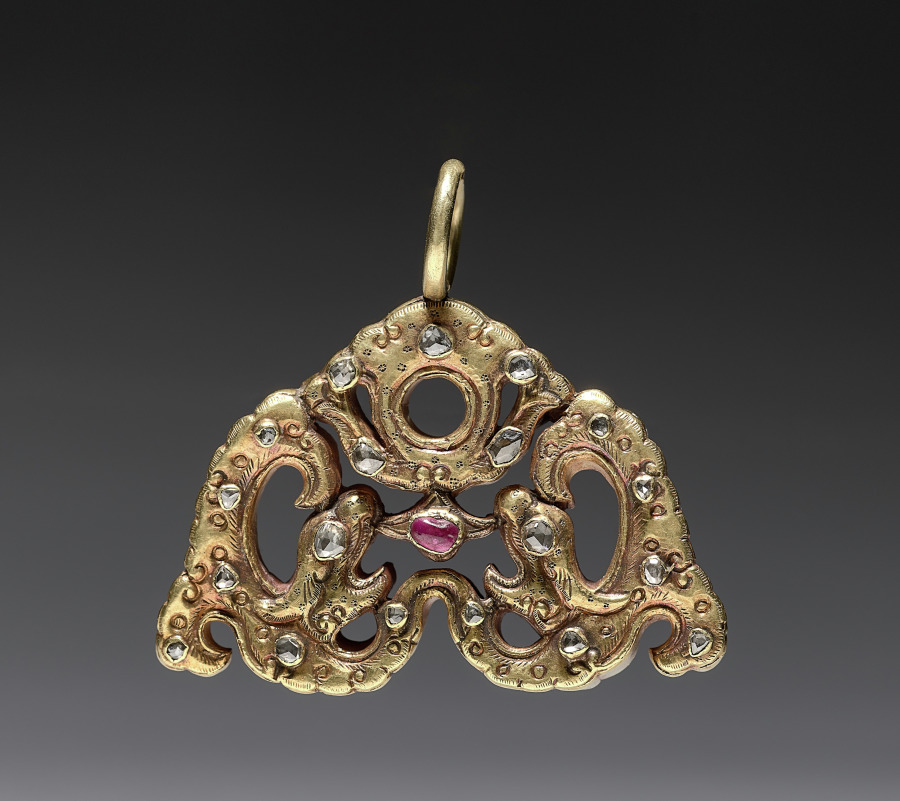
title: Pendant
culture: Siam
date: 1800s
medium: gold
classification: Jewelry